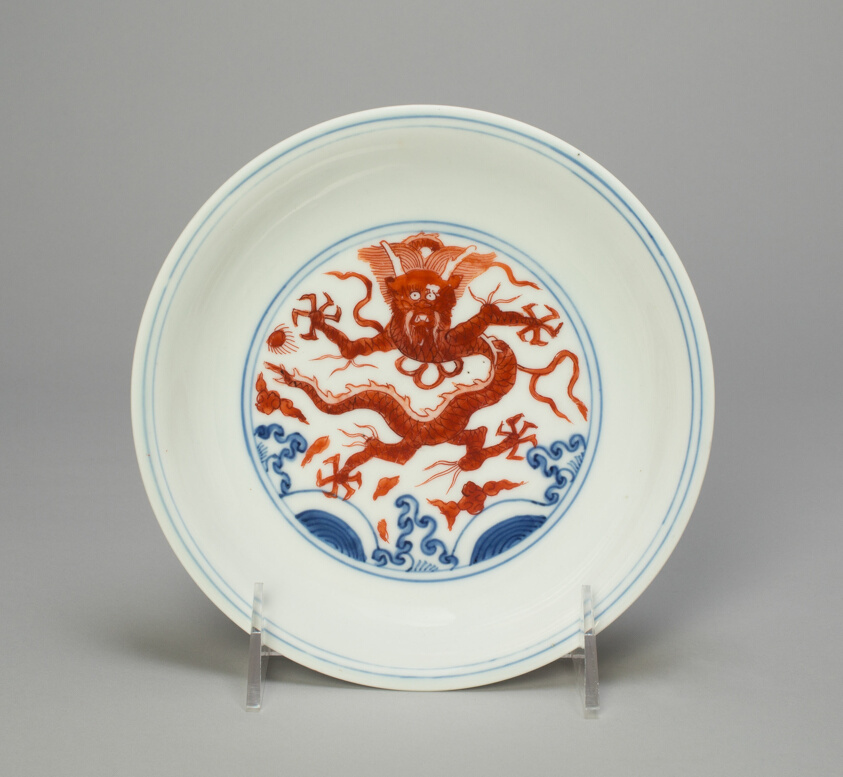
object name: Vessel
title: Dish with Dragons above Waves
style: Chinese (culture or style)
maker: China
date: Ming dynasty (1368–1644), Wanli reign mark and period (1573–1620)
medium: Porcelain painted in underglaze blue and iron red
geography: China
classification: dish (vessel); porcelain; asian art; ceramics; vessel